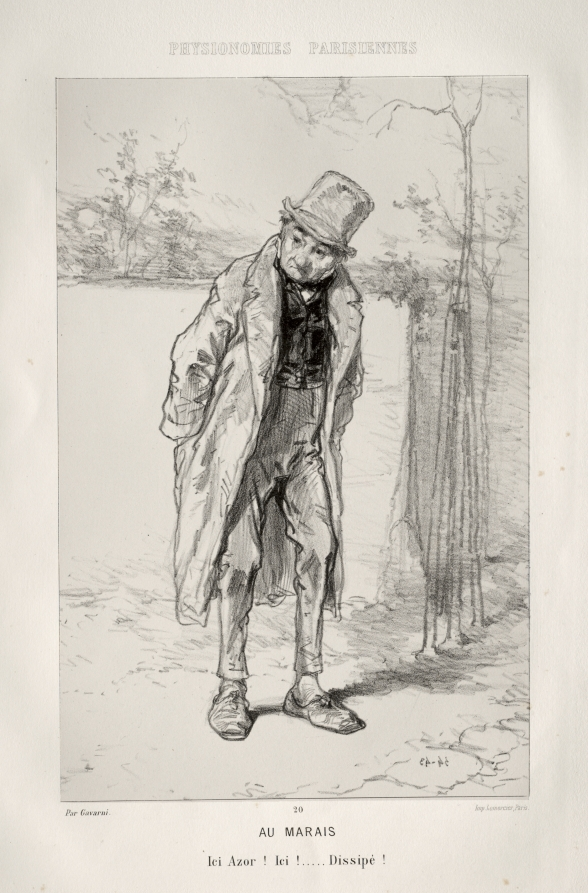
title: In the Quarter of the Marais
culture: France, 19th century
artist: Paul Gavarni (French, 1804–1866)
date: c. 1857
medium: lithograph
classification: Print